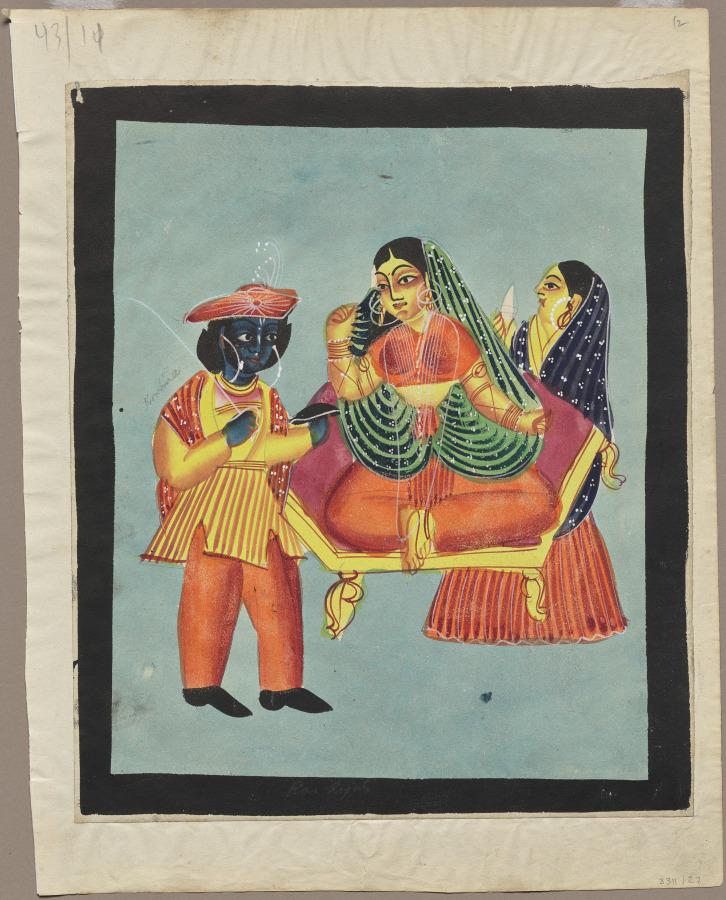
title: Rai Raja, from a Kalighat album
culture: Eastern India, Bengal, Kolkata, Kalighat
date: c. 1890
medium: Gum tempera, graphite, and ink on paper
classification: Painting